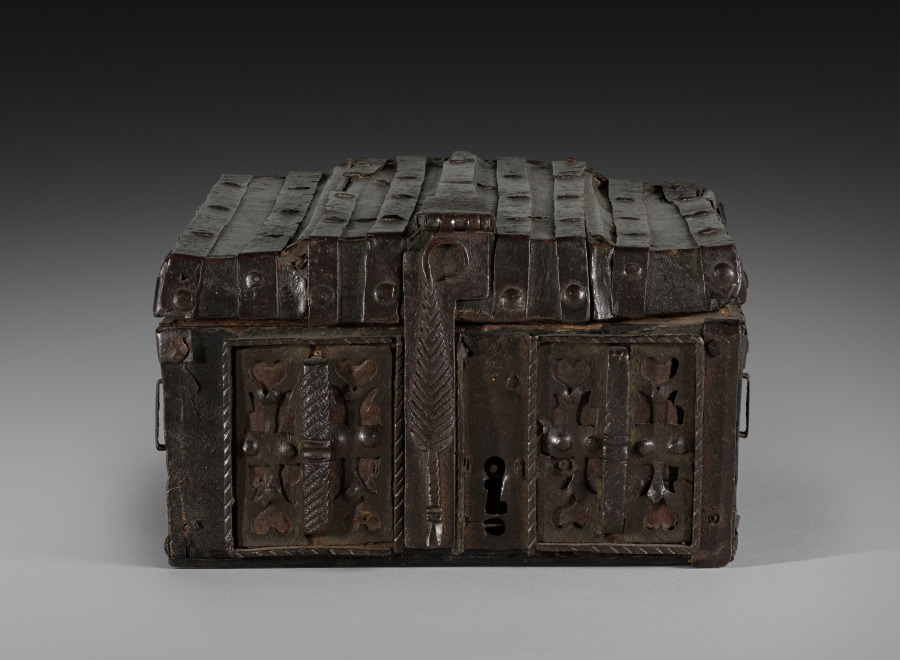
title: Coffret with Woodcut of Saint Veronica's Vernicle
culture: Coffret: France, probably Paris; Woodcut: Germany, Augsburg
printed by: Hans Burgkmair the Elder (German, 1473–1531)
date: Coffret: c. 1515; Woodcut: c. 1509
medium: Wood, leather, iron, textile, woodcut with stenciled coloring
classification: Print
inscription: SALVE. XPI. EFFIGIES. SACERRI[M]A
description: This remarkable object is thought to have functioned as a traveling case to keep small valuables and books, as well as a provisional altar. Made in France around 1515, the interior lid is affixed with a devotional woodcut made in Germany, imported, and colored for the purpose. Featuring an image of the veil of Saint Veronica, the text at the bottom of the woodcut guides the user in prayer to the holy image of Christ’s face which has been miraculously imprinted on the veil, an action that held promise of indulgences (a reduction in one’s punishment for sins). Presumably, the owner carried the box on a journey, retrieved a prayer book from inside, and propped it open in order to practice daily prayers.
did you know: A secret compartment on the top lid of this coffer may have held a relic, consecrated host, or valuable document.